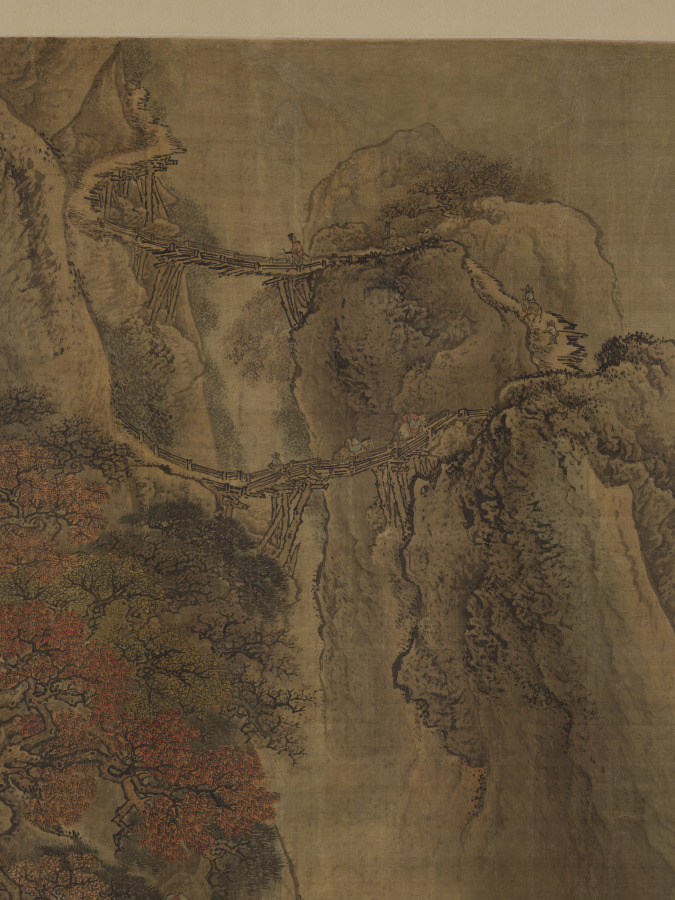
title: Road to Shu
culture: China, Qing dynasty (1644–1911), Qianlong reign (1736–95)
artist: Yuan Yao (Chinese, active mid-1700s)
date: 1743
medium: Hanging scroll; ink and color on silk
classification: Painting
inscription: artist's seals: yuan yao shi yin 袁耀 之印, zhao dao shi 昭道 氏 two collector’s seals: jin ju and illegible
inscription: Shu han xinglü //shi guihai xia //Hanshang Yuan Yao hua// 蜀椷行旅时癸亥夏- 邗上 袁耀 画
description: Few works by the Yuan workshops in Yangzhou present a continuous composition of such monumental scale as this hanging scroll. Road to Shu (in Sichuan province) depicts the trade of goods over long distances and through mountainous terrain. Busy travelers lead mules over footbridges, mountain paths wind along steep slopes, and soaring bridges connect peaks divided by deep gorges. The Yuan studios produced paintings to decorate the residences of wealthy Yangzhou salt merchants and princely palaces. The title Road to Shu refers to the historical drama of the flight of Tang emperor Xuanzong (reigned 712–56) to Sichuan in the aftermath of the An Lushan Rebellion (755–63). At the same time, the scenery alludes to Anhui, the mountainous native country of many of the salt merchants and their trade routes in northern parts of the empire.